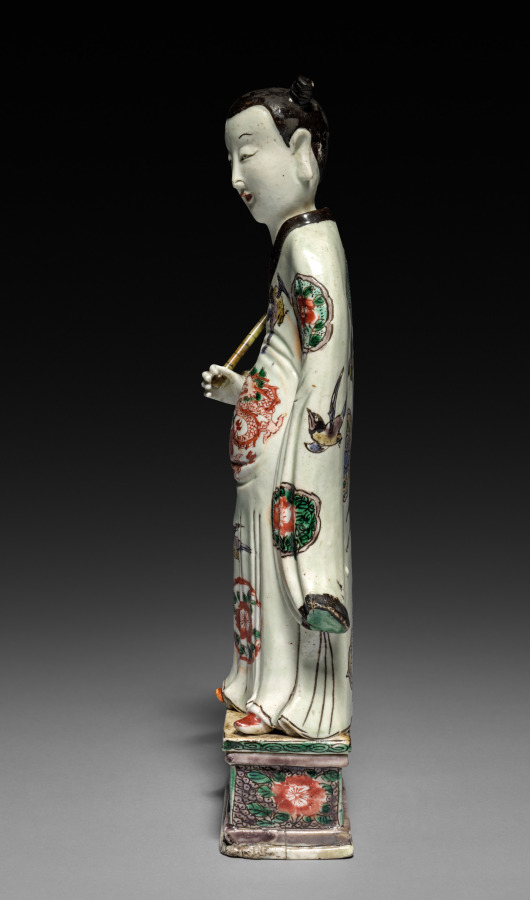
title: Daoist Immortal Han Xiangzi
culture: China, Jiangxi province, Jingdezhen kilns, Qing dynasty (1644-1911), Kangxi reign (1662-1722)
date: 1662–1722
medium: porcelain with famille verte overglaze enamel decoration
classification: Ceramic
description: One of the Eight Immortals, Han Xiangzi was said to be the nephew of the famous Tang dynasty poet Han Yu (768–824). He is usually shown as a young boy holding a flute. Han is wearing a white robe decorated with peonies, hinting at his identity as the patron of florists and his legendary ability to make peonies bloom in winter. A four-clawed dragon, a decorative motif typically used for imperial nobility and certain high-ranking officials, decorates Han’s robe.